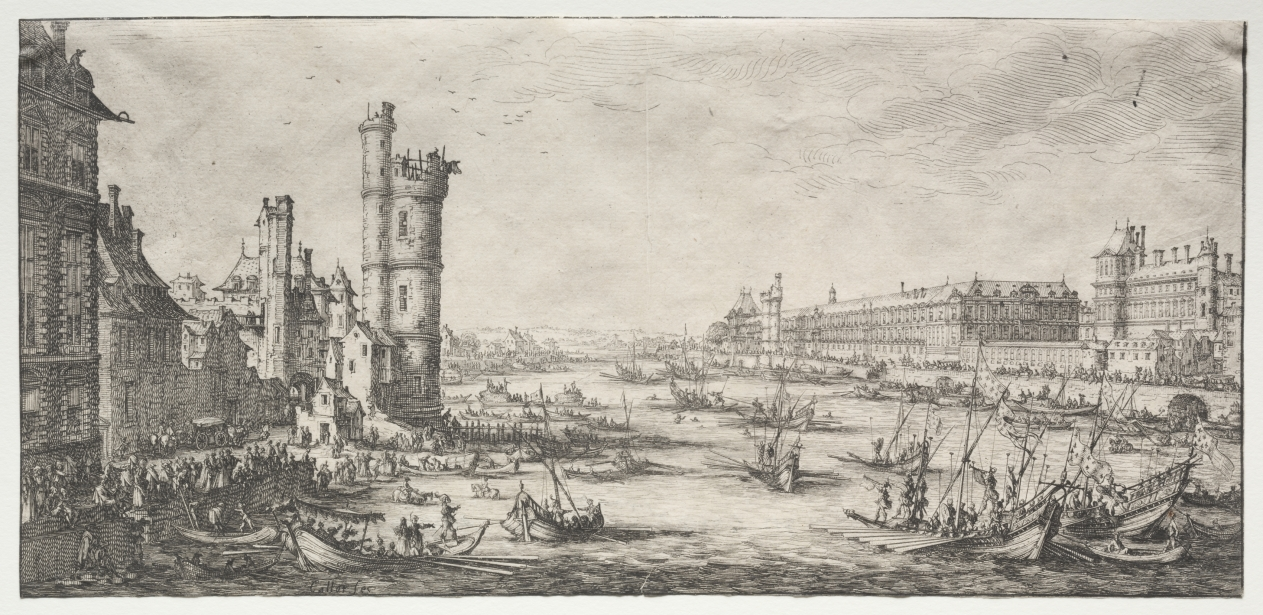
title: Les deux grandes vues de Paris: Vue du Louvre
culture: France, 17th century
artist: Jacques Callot (French, 1592–1635)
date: 1628–1630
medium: etching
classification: Print